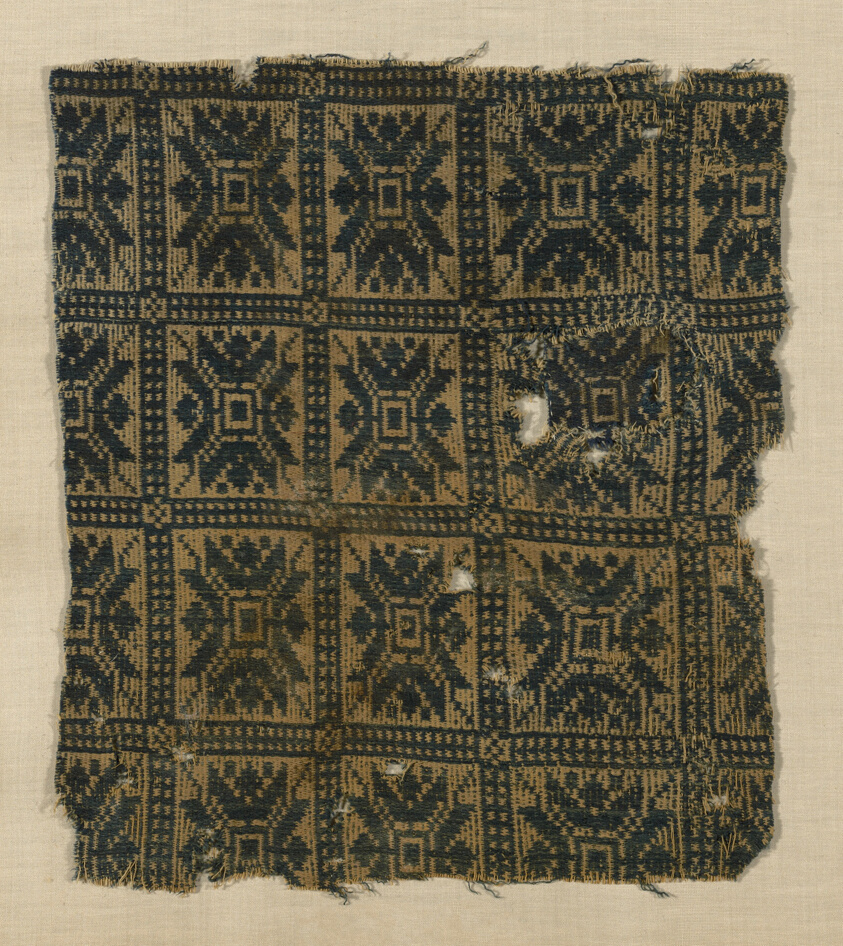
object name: Textile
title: Fragment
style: roman period (egyptian)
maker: Egypt, Akhmin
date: Roman period (30 B.C.– 641 A.D.), 4th century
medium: Linen and wool, compound weave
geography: Egypt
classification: textile; weaving